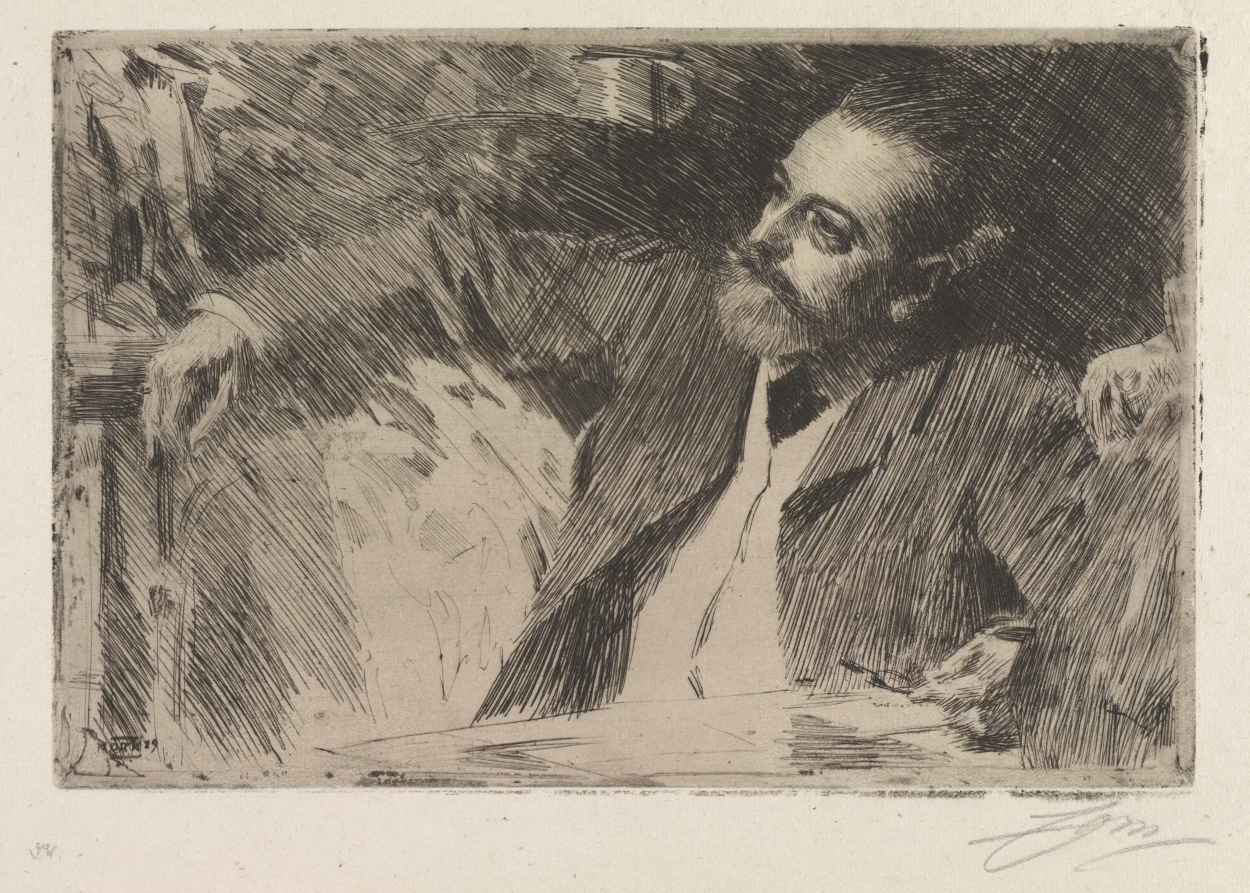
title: Antonin Proust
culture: Sweden, 19th century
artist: Anders Zorn (Swedish, 1860–1920)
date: 1889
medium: etching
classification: Print